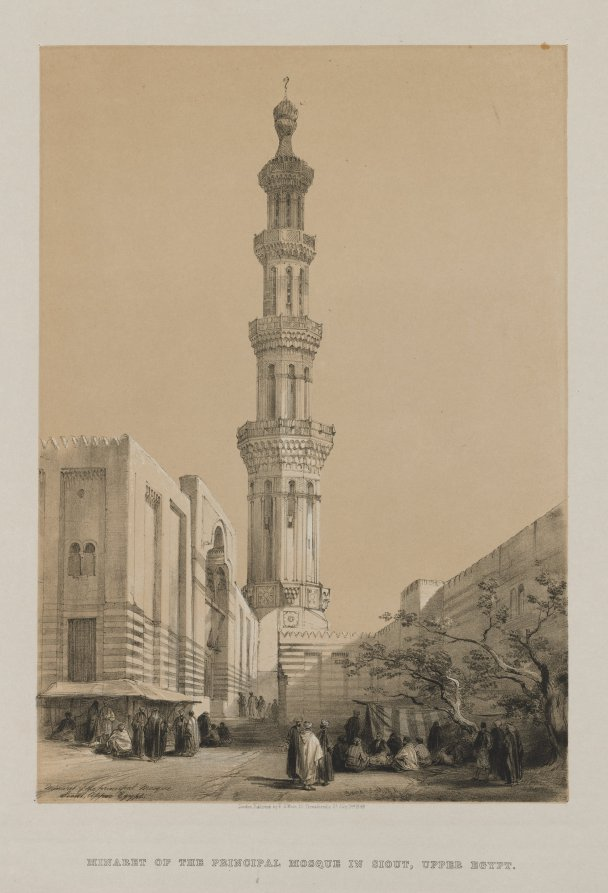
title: Egypt and Nubia, Volume III: Minaret of the Principal Mosque Siout, Upper Egypt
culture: England, 19th century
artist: Louis Haghe (British, 1806–1885)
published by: F. G. Moon, 20 Threadneedle Street, London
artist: after David Roberts (Scottish, 1796–1864)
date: 1849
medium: color lithograph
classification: Print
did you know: The minaret is the tower from which the call to prayer, adhan, is recited.